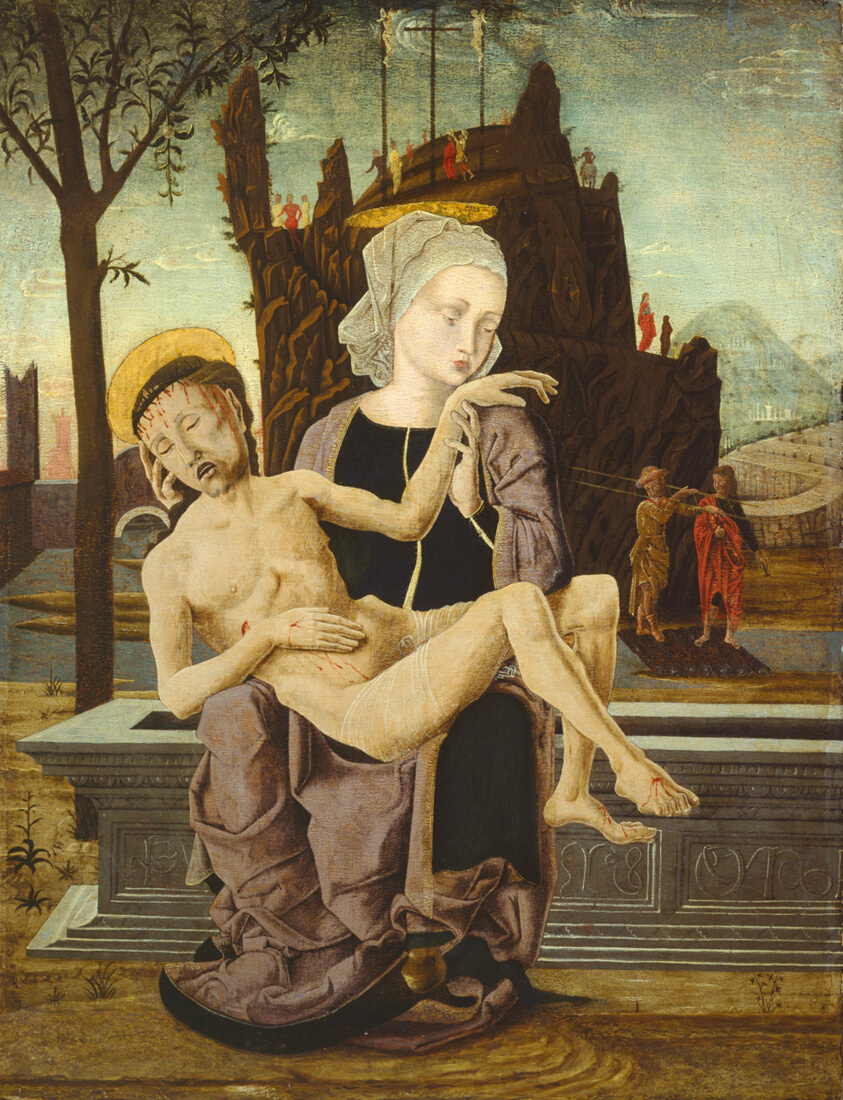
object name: Painting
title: Pietà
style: 15th century, Renaissance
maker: After Cosimo Tura (Italian, c. 1430–1495)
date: 1475/1500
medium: Tempera on panel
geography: Italy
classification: tempera; paint; Italian; painting; european painting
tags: Christian subjects, Virgin Mary, Jesus, death, angels, Christianity, men, purple (color), trees, mountain, mountains, paths, heaven, crowns, figures, foliage, Century of Progress, world's fairs, Chicago World's Fairs